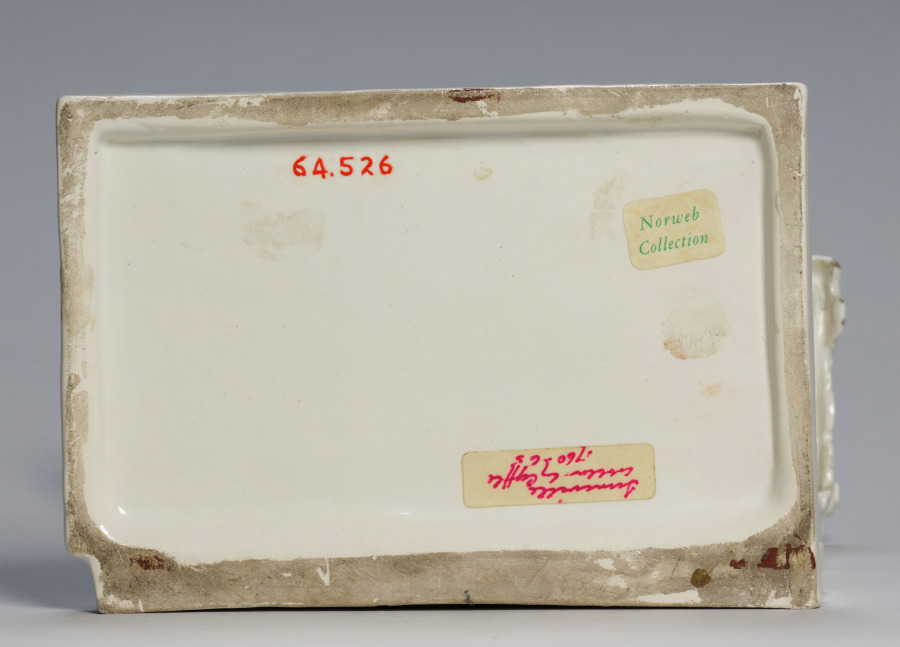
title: The Cobbler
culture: Italy or France, 19th century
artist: after a design by Paul-Louis Cyfflé (Flemish, 1724–1806)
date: 1800s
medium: earthenware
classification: Ceramic